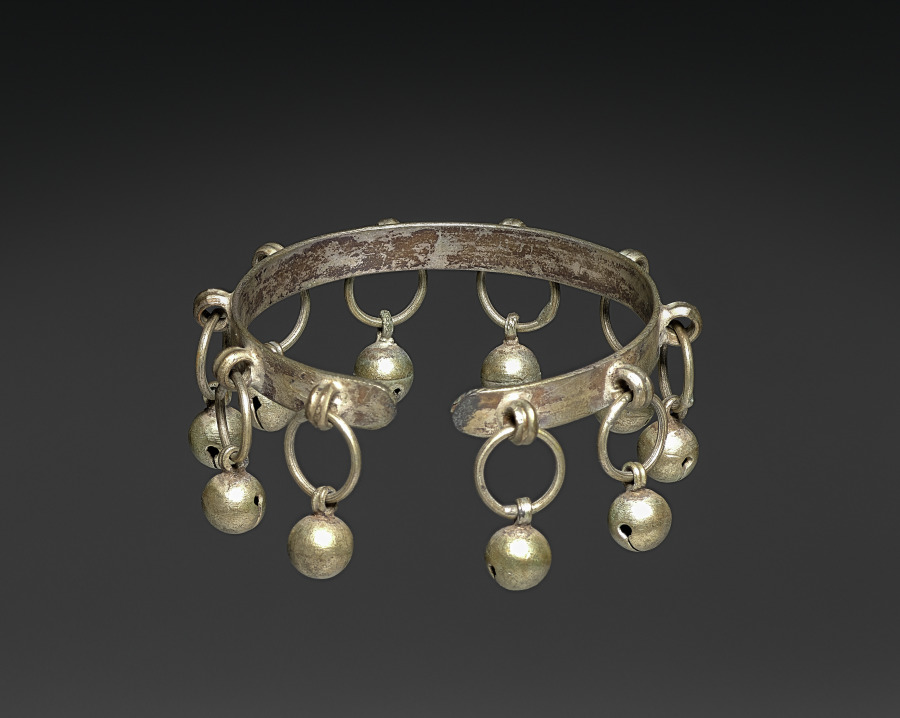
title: Wristlet or Anklet for Children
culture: India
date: early 1900s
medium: silver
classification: Jewelry